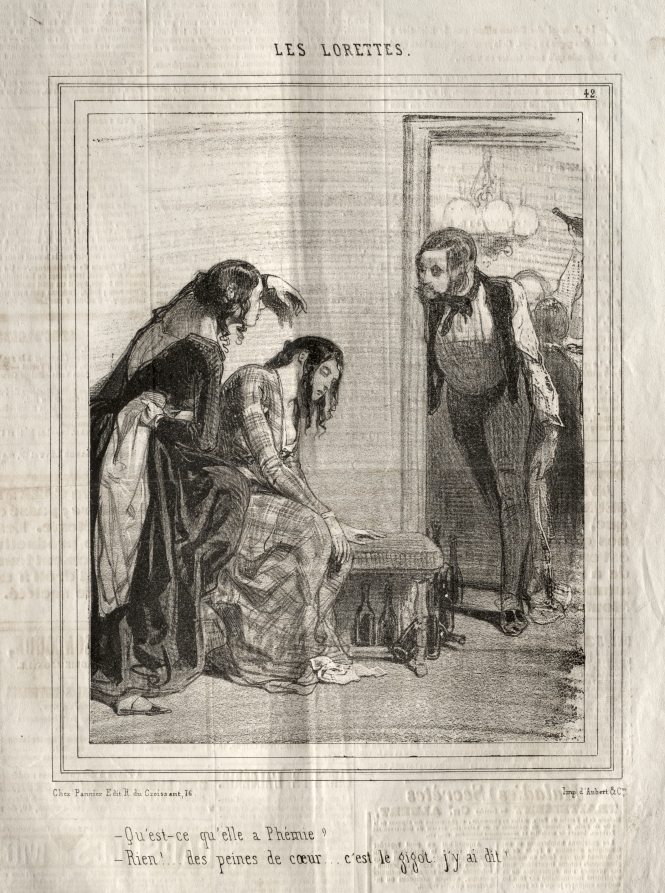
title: Les Lorettes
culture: France, 19th century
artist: Paul Gavarni (French, 1804–1866)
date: 1842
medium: lithograph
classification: Print